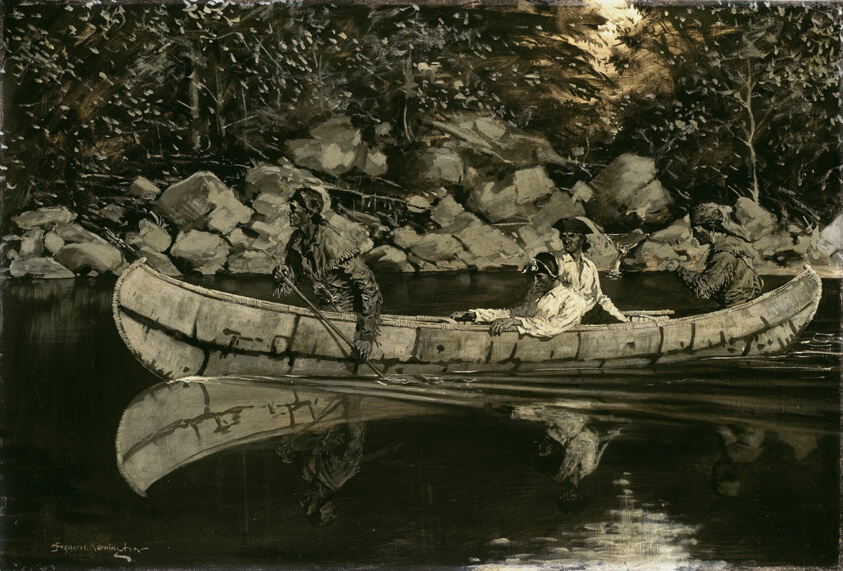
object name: Painting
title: Paddling the Wounded British Officer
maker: Frederic Remington (American, 1861–1909)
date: 1897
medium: Oil on canvas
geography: New York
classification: painting; american arts